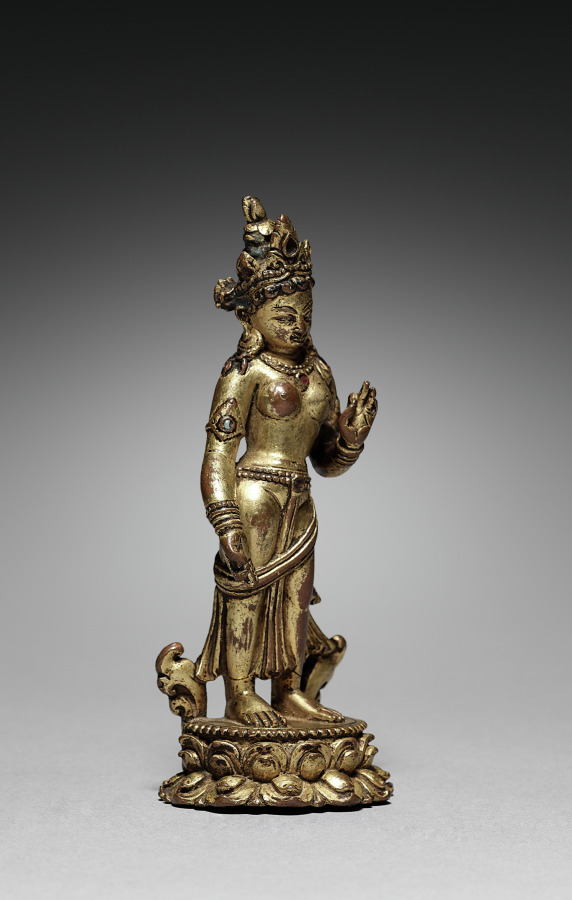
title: Standing Tara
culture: Nepal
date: 1300s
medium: bronze, gilded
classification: Sculpture